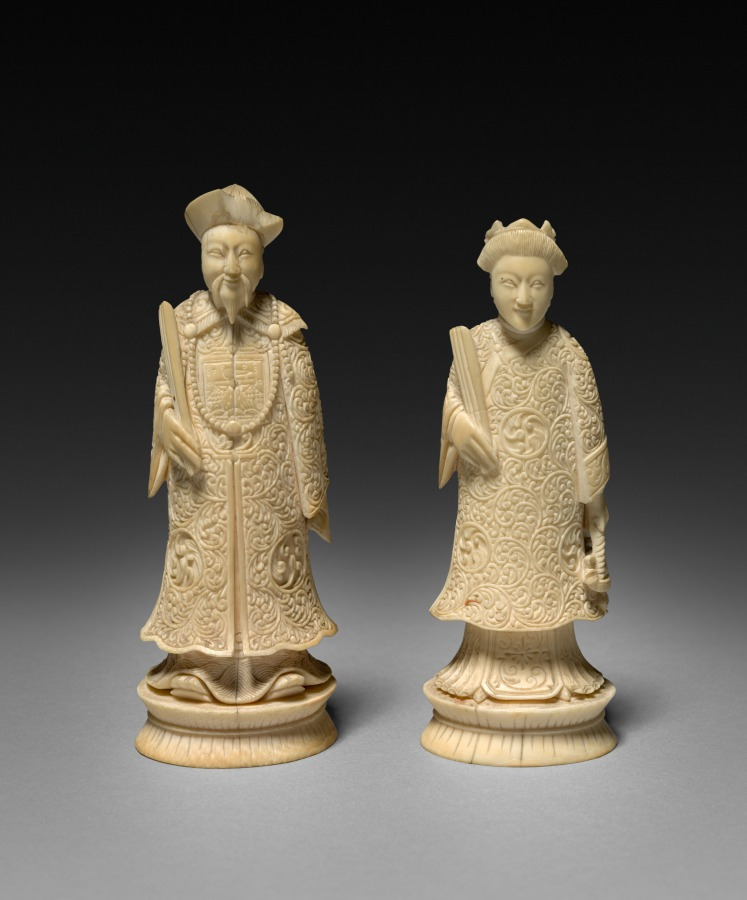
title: Chess Pieces: King and Queen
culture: Japan, Meiji period (1868–1912)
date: early 1900s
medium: ivory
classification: Ivory